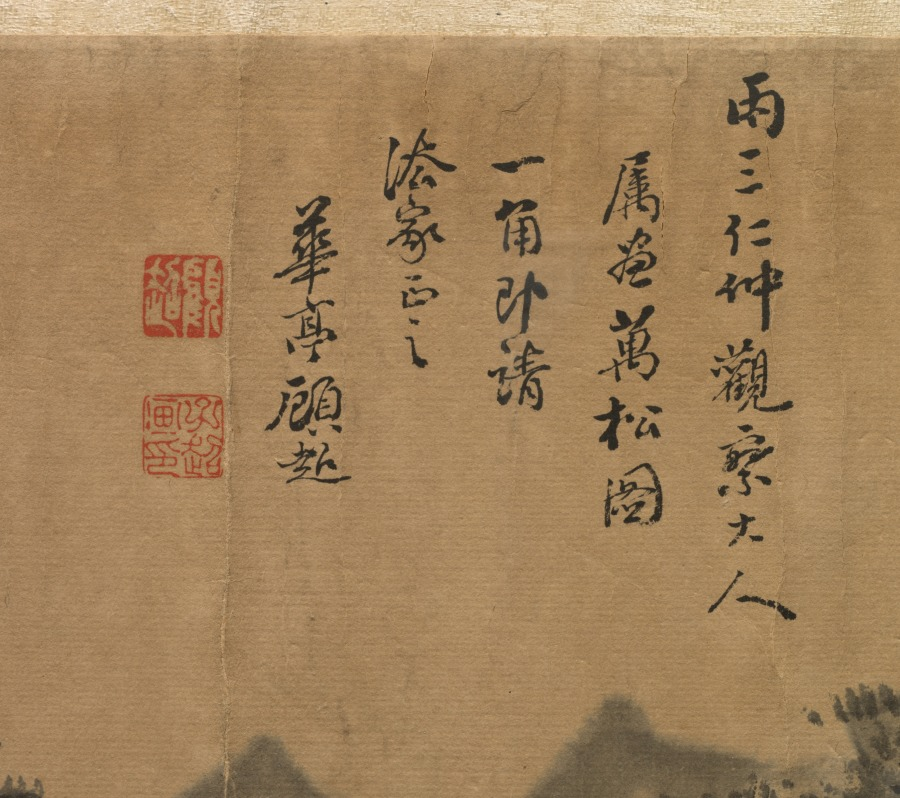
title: Pine-shaded Monastery on a Cloudy Mountain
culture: China, Qing dynasty (1644-1911)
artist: Gu Chao (Chinese, active late 1700s)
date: late 1700s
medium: handscroll, ink and slight color on paper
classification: Painting